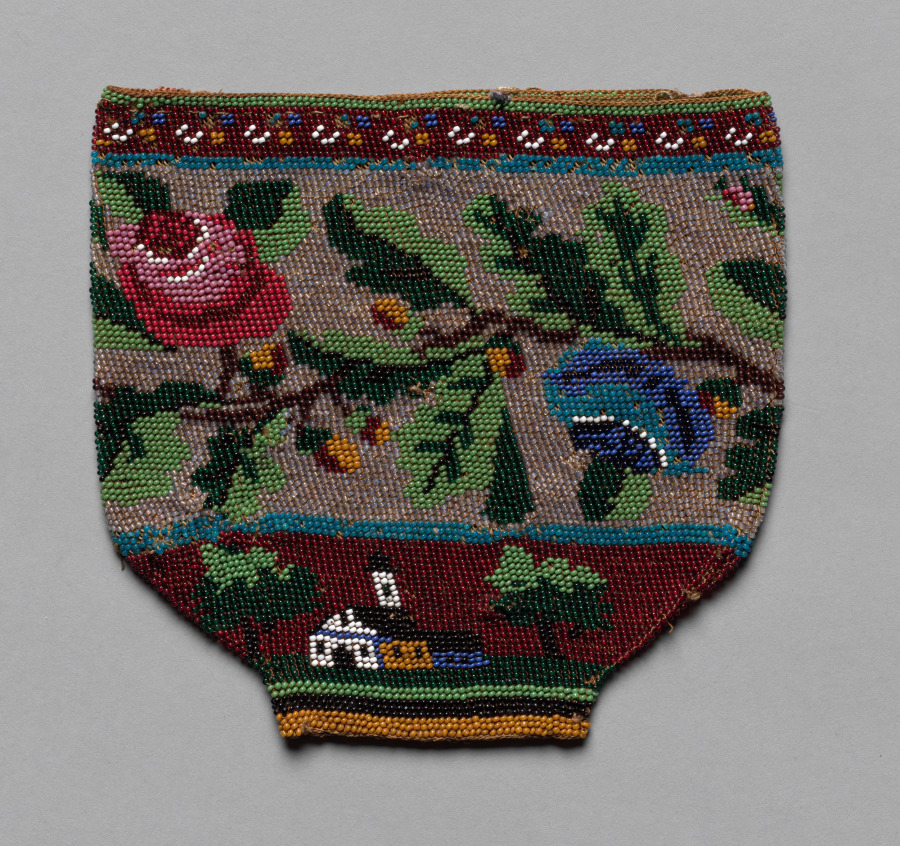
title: Beaded Bag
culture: America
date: c. 1835–1840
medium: crocheted, with beads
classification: Garment